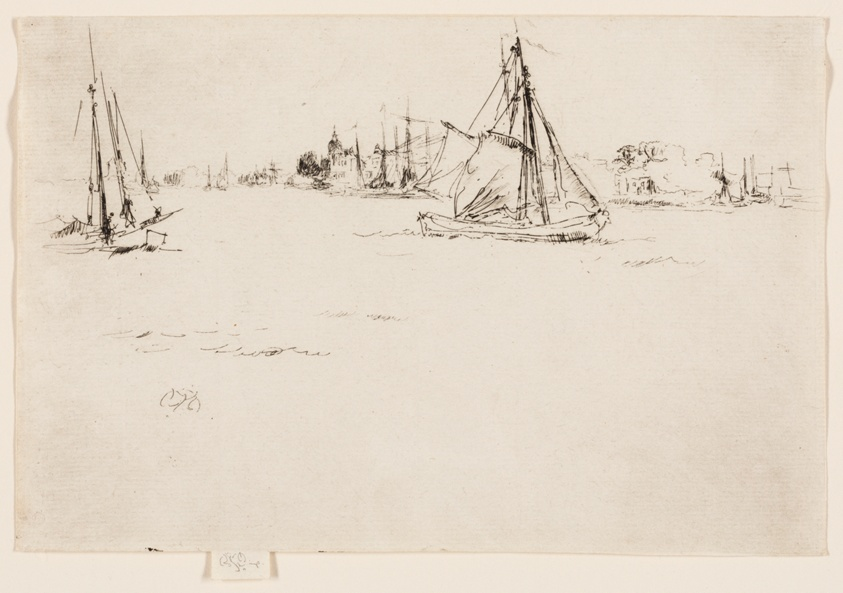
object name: Print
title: Dordrecht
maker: James McNeill Whistler (American, 1834-1903)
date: 1886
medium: Etching with drypoint in black ink on cream laid paper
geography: United States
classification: etching; drypoint; print; prints and drawing; paper